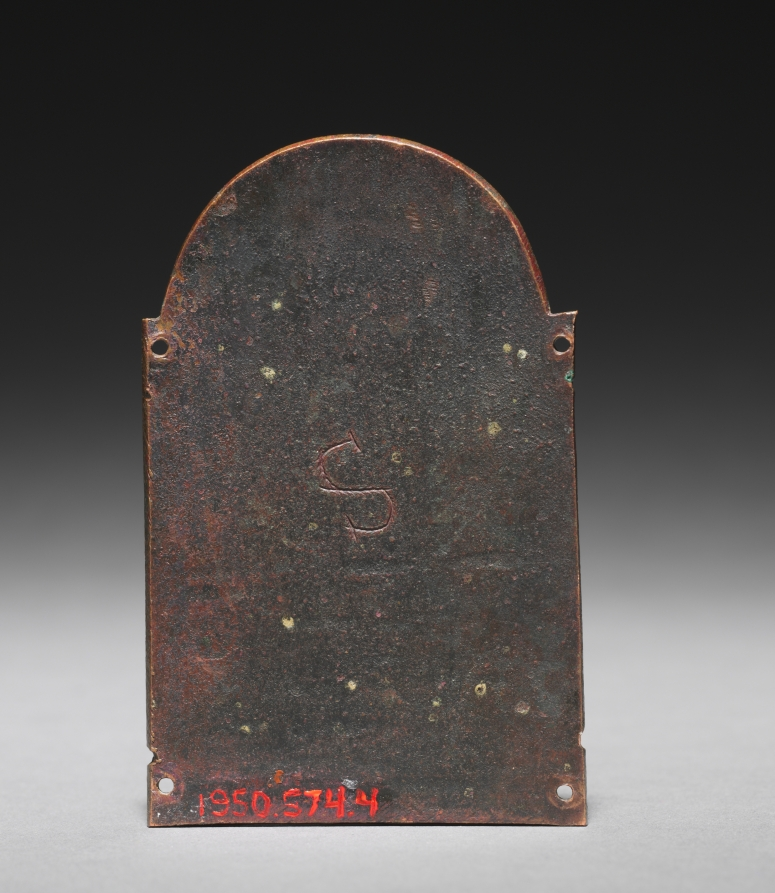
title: Plaque with Seated Prophet from a Reliquary Shrine: Osea (Hosea)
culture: Germany, Lower Saxony, Hildesheim, Romanesque period, 12th century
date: c. 1170–80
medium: gilded copper, champlevé enamel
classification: Enamel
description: Once used as decorations for a reliquary shrine, each enamel plaque represents a biblical prophet: Isaiah, Obadiah, Elisha, and Hosea. Fine gold dots punctuate dark blue backgrounds. Typical of Hildesheim enamels, this detailing creates the illusion that the prophets sit against star-studded twilight skies.